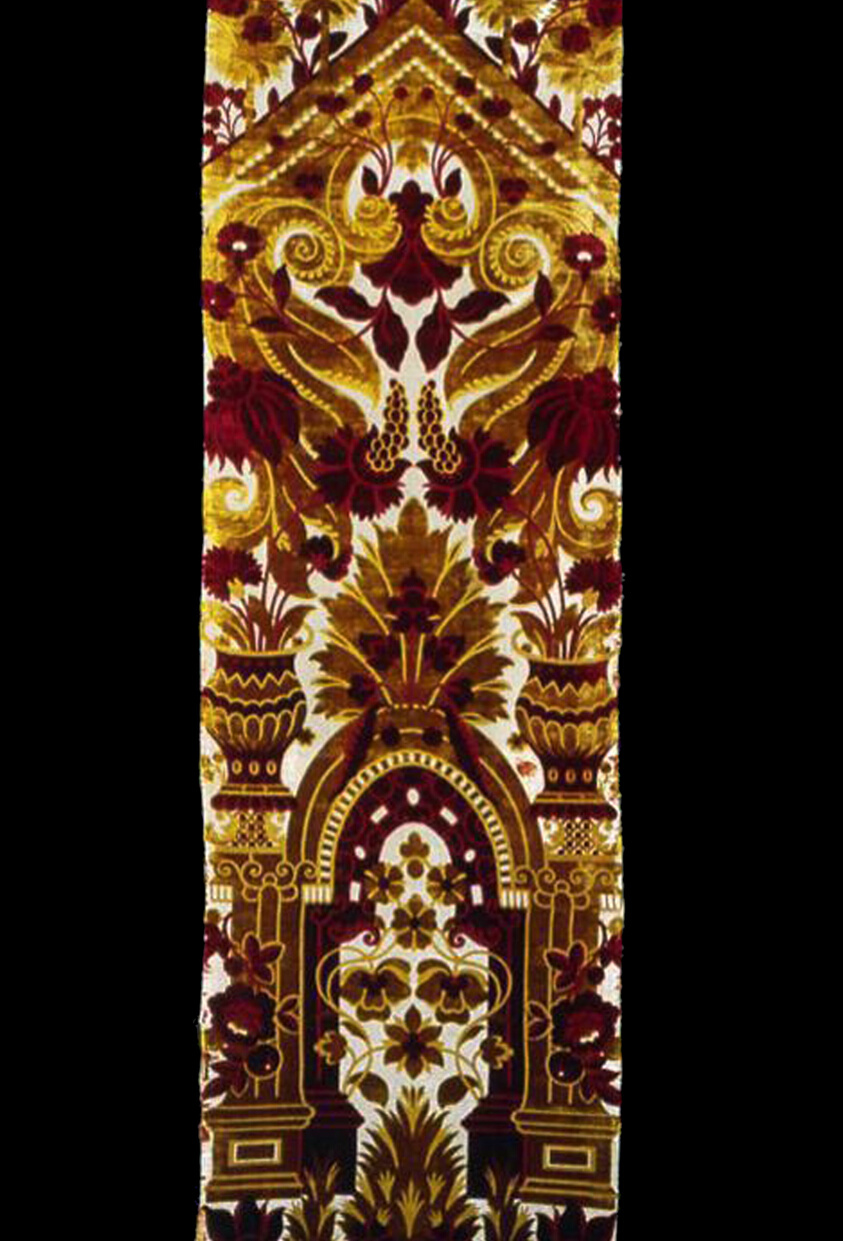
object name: Textile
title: Panel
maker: Italy, possibly Florence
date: 1714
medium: Silk and linen, warp-float faced 7:1 satin weave with two-color supplementary pile warps forming cut and uncut voided velvet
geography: Italy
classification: textile; weaving - velvet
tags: weddings, columns, flowers, foliage, grapes, urns, coat of arms, royalty